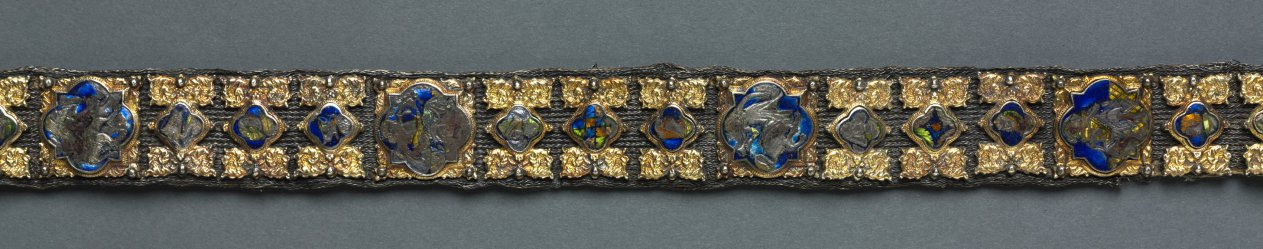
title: Belt for a Lady's Dress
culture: Italy, Siena(?)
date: c. 1375–1400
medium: basse-taille enamel and gilding on silver, silver thread, gilt-silver buckle, cast and chased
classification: Jewelry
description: Because of its extraordinary richness, this belt (also known as a girdle) was both an ornament for the body and an object of great personal luxury. Almost eight feet in length, belts like this were at the height of fashion for both men and women. After being passed around the waist and through the buckle, one end of the belt would fall to the hem of the garment. The belt's many colorful enamel plaques are worked in translucent enamel over decoration engraved into the silver beneath (an enameler's technique known as basse-taille). Within the plaques and cast into the buckle are scenes of courtly love, musicians, and fantastic animals. A large number of translucent enamels were made for secular objects during the late Middle Ages for use on jewelry, cups, garment clasps, and similar objects. This belt is a rare survival among these now scarce objects.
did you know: Look closely at the tiny scenes of courtly love on the plaques that adorn this belt. Given their size, these scenes were designed for the enjoyment of the woman who wore this belt over a sumptuous dress rather than an admirer from a distance.